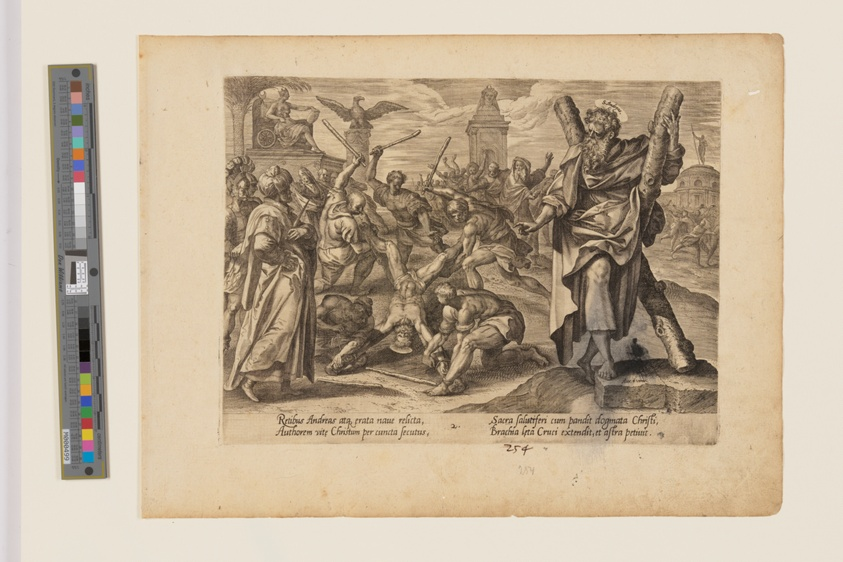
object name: Print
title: The Martyrdom of St Andrew, from The Martyrdom of Christ and the Apostles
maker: Hendrick Goltzius (Dutch, 1558–1617); after Maarten de Vos (Flemish, 1532–1603); published Hieronymus Cock (Netherlandish, c. 1510–1570)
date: c. 1578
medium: Engraving on ivory laid paper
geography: Netherlands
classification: engraving; paper; print; prints and drawing